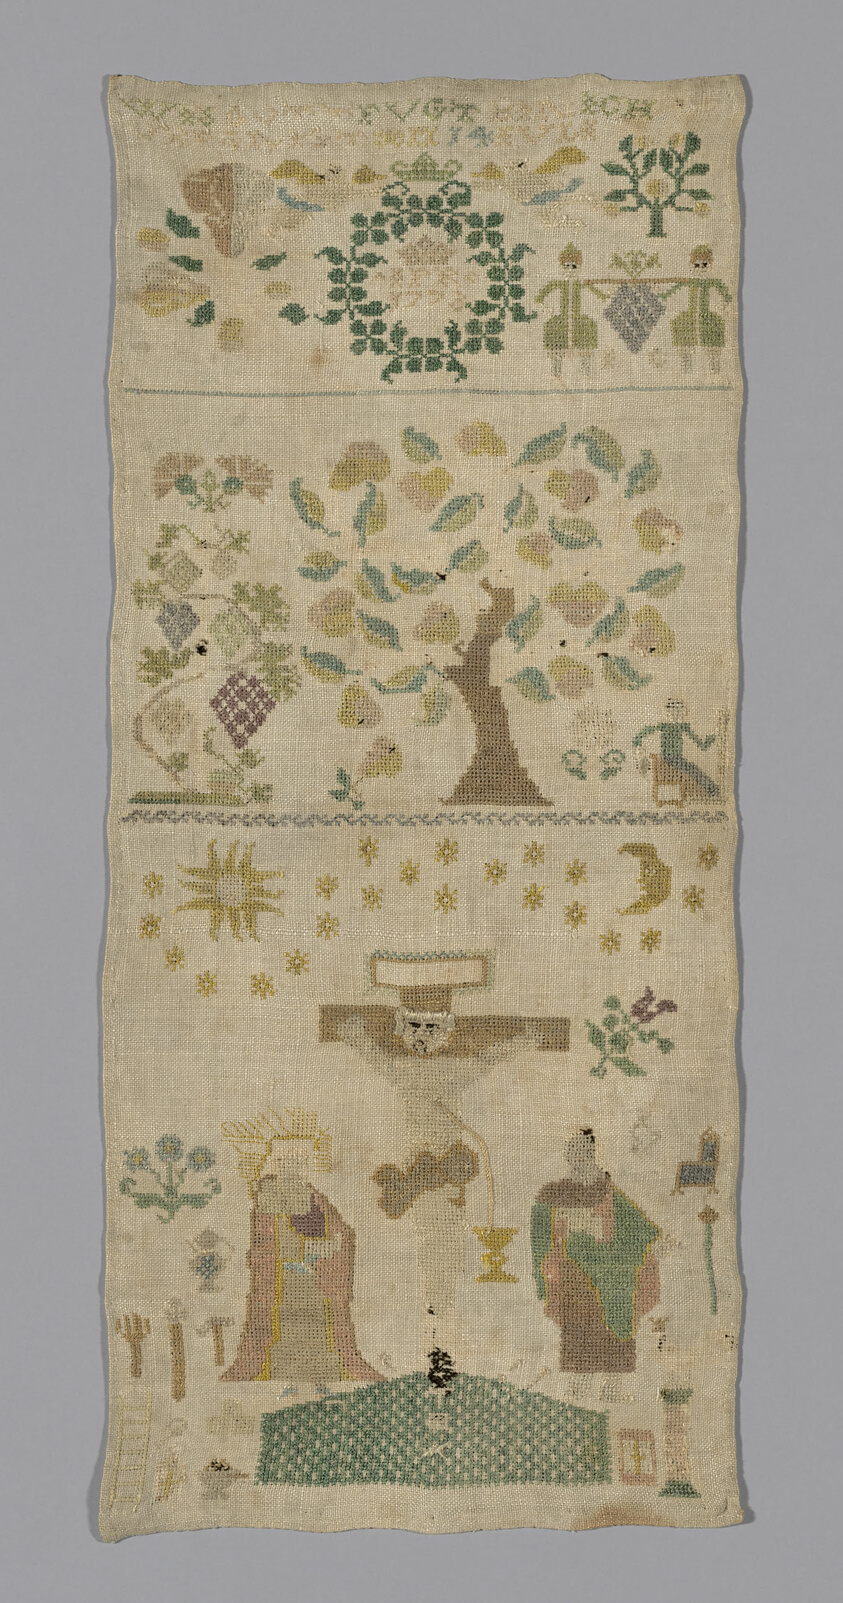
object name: Textile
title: Sampler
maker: Germany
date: 1778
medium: Linen, plain weave; embroidered with silk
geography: Germany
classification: textile; sampler; needlework (visual works)